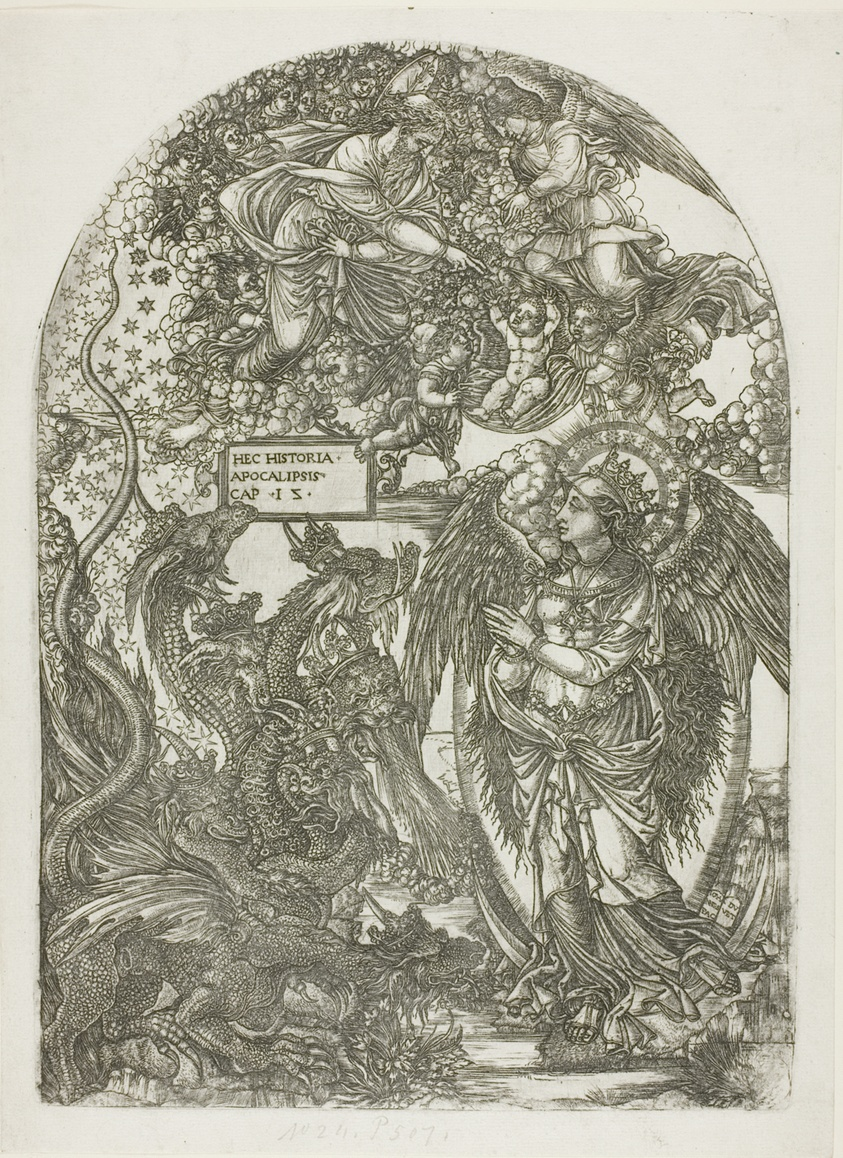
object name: Print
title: The Woman Clothed with the Sun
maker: Jean Duvet (French, 1485-after 1561)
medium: Engraving in black on ivory laid paper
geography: France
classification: engraving; print; prints and drawing